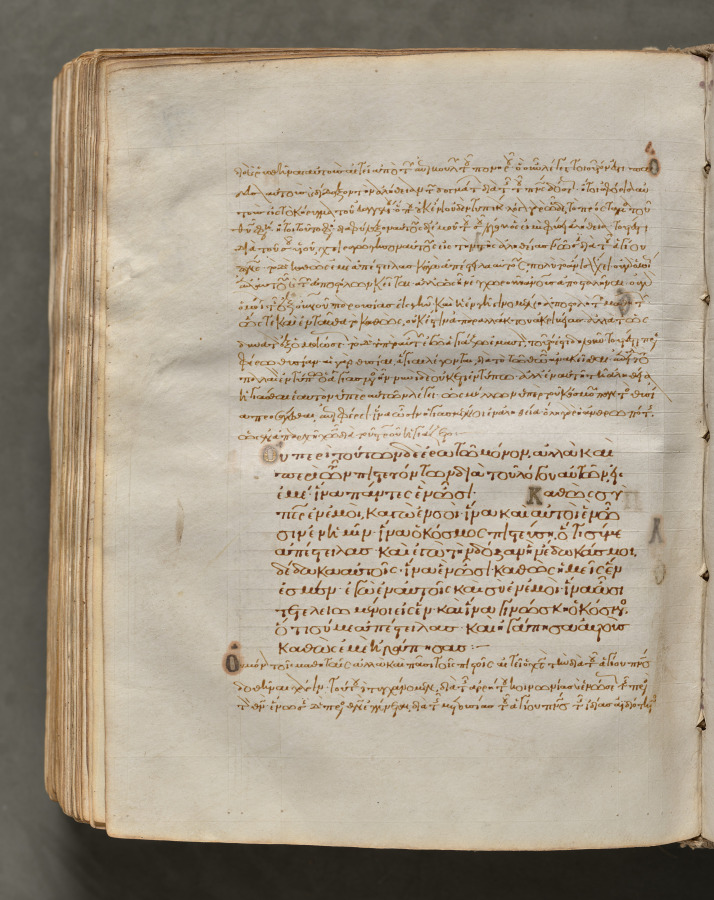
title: Text, folio 405 (verso), from a Gospel Book with Commentaries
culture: Byzantium, Constantinople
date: c. 1000–1100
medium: ink, tempera, and gold on vellum; leather binding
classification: Bound Volume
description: Each of the four gospels in this book opens on a page with brilliantly illuminated borders depicting the author of the text as well as birds—principally peacocks, symbols of the immortality of the soul—and fountains, representing the fountain of life and the salvation of the soul. This volume consists of 428 leaves with texts in Greek. Its level of sophistication suggests that it was probably written and decorated in a monastery in Constantinople.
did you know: Gospel books were carried in procession through Byzantine churches.